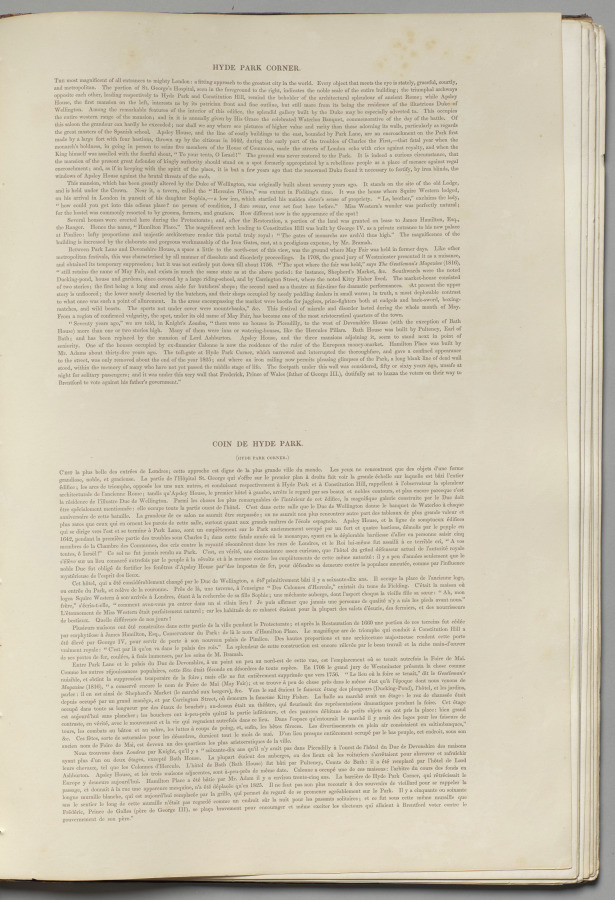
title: London As It Is: Hyde Park Corner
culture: England, 19th century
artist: Thomas Shotter Boys (British, 1803–1874)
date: 1842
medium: lithograph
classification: Bound Volume